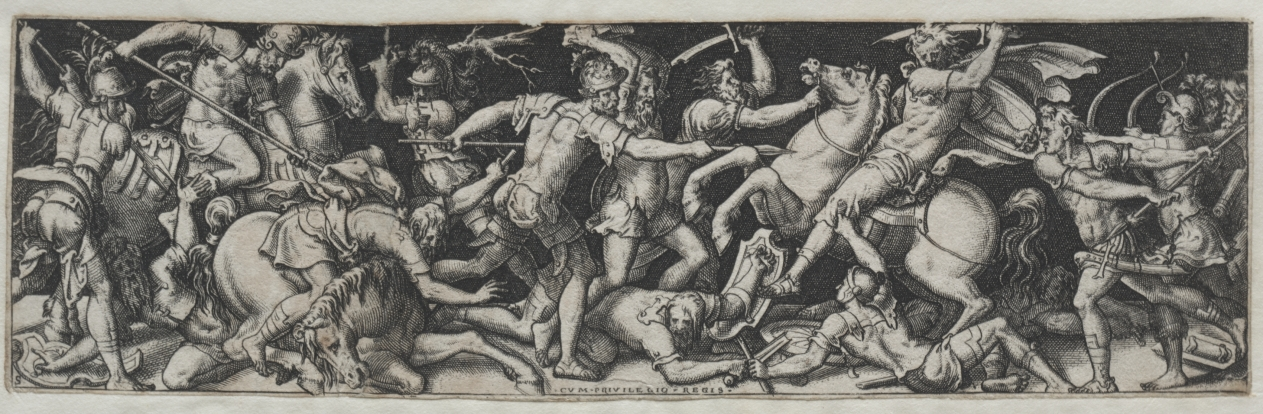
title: Combats and Triumphs No. 11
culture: France, 16th century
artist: Etienne Delaune (French, 1518/19-c. 1583)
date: c. 1550–72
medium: engraving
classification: Print